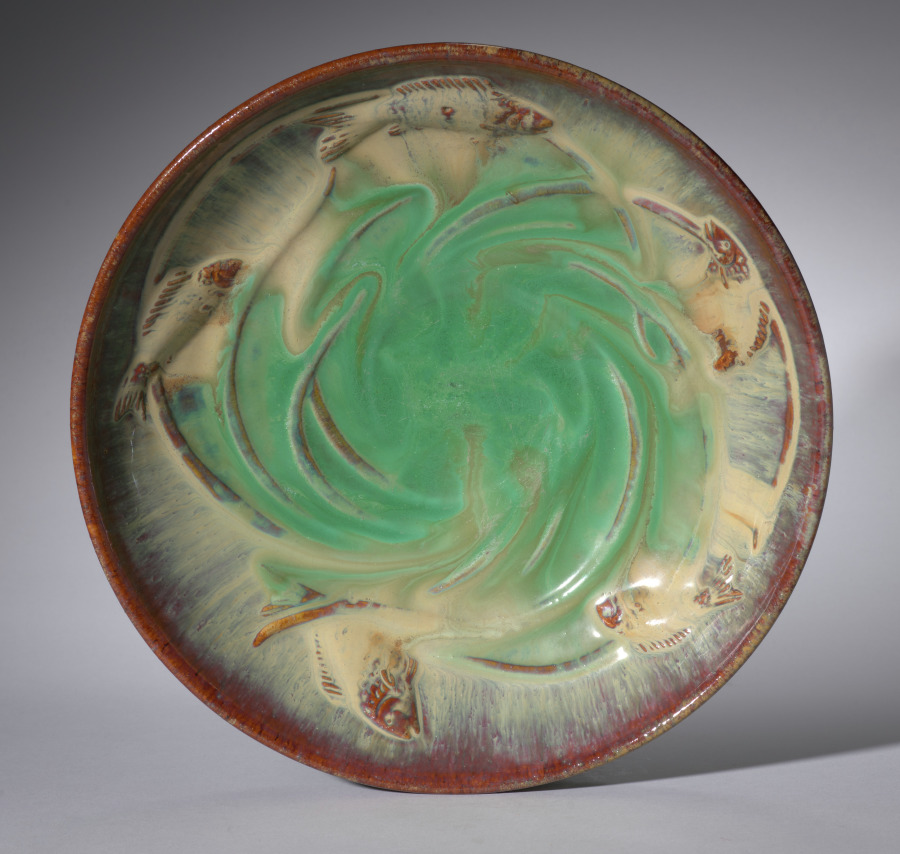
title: Bowl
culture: America, New Jersey, 20th century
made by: Fulper Pottery (American)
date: c. 1910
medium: stoneware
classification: Ceramic